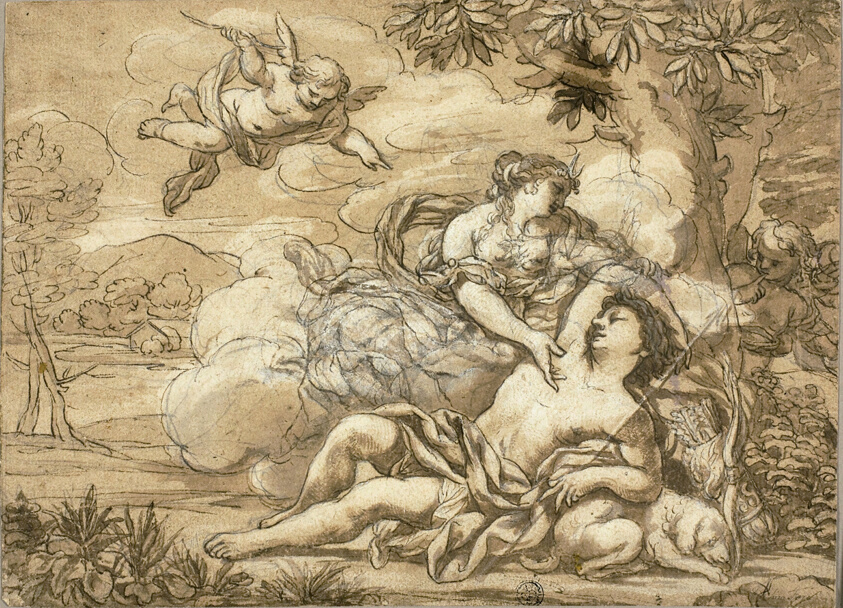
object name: Drawing and Watercolor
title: Diana and Endymion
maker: probably after Ciro Ferri; Italian, 1634-1689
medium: Pen and brown ink, with brush and brown wash, heightened with lead white (discolored), over black chalk, on tan laid paper, laid down on cream laid paper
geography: Italy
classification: pen and ink drawings; drawings (visual works); prints and drawing